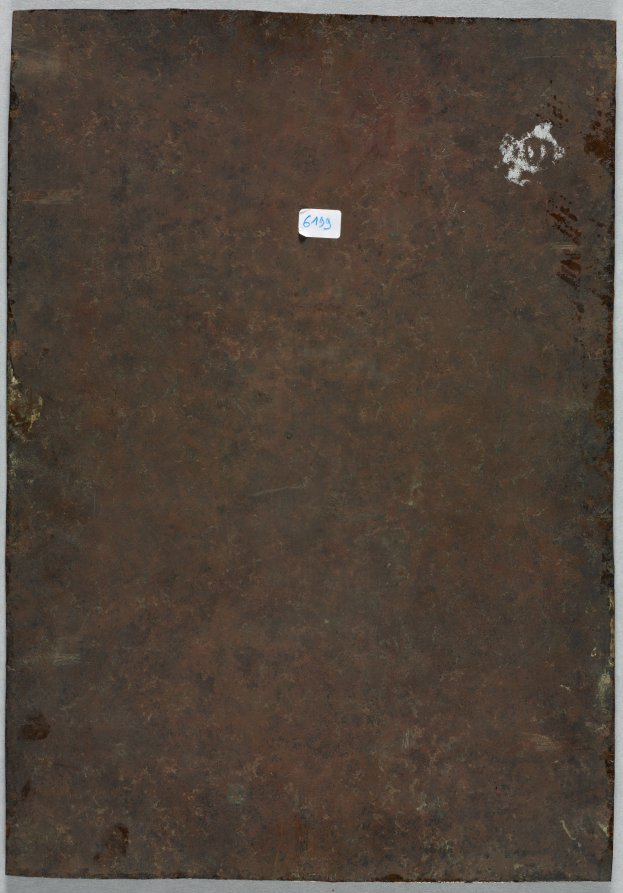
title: Our Lady of Good Counsel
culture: Spain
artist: Bartolomé Pérez (Spanish, 1634–1693)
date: c. 1680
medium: oil on copper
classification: Painting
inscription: Signed lower left: "B.me. P.z D." In ribbon on top: N. Señora del /Buen Consejo Under figure at left: S. Franco Under figure at right: B.S. Luys. Gonzaga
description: This painting loosely and inventively depicts an actual chapel in the former Jesuit Imperial College in Madrid, which housed a Madonna and Child in gilded and painted wood, a focus of popular devotion. Pérez made temporary decorations for the Spanish court, none of which survive, but the fanciful architecture, curiously inverted obelisks, fruits and flowers, and pastel colors all stem from this side of his work. By representing a polychrome sculpture in two dimensions, Pérez further blurred boundaries between painting and sculpture. This intersection of the spiritual and the real worlds was important in Spanish art of the 1600s.